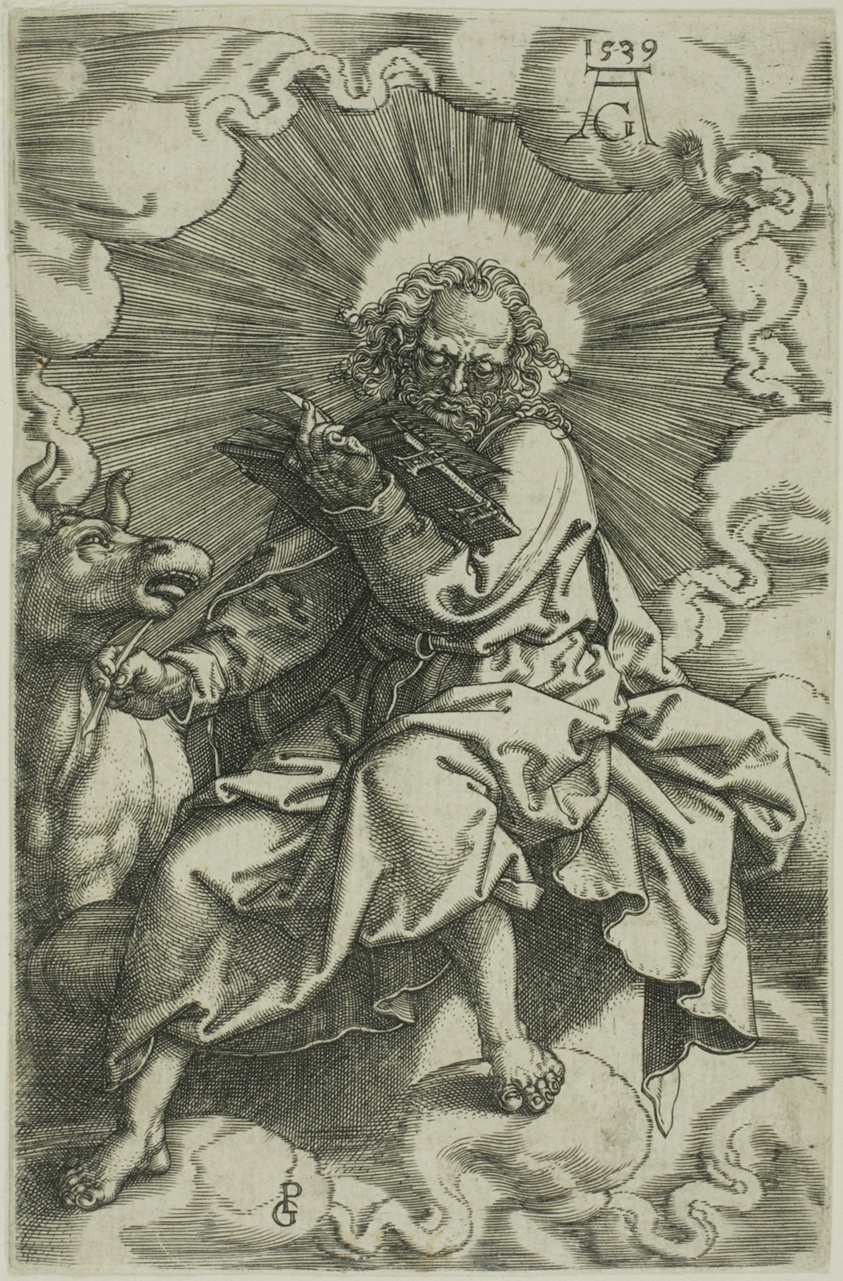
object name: Print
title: St. Luke, from The Four Evangelists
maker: Heinrich Aldegrever (German, 1502-c. 1560); after Georg Pencz (c. 1500-1550)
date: 1539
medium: Engraving in black on ivory laid paper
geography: Germany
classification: engraving; print; prints and drawing